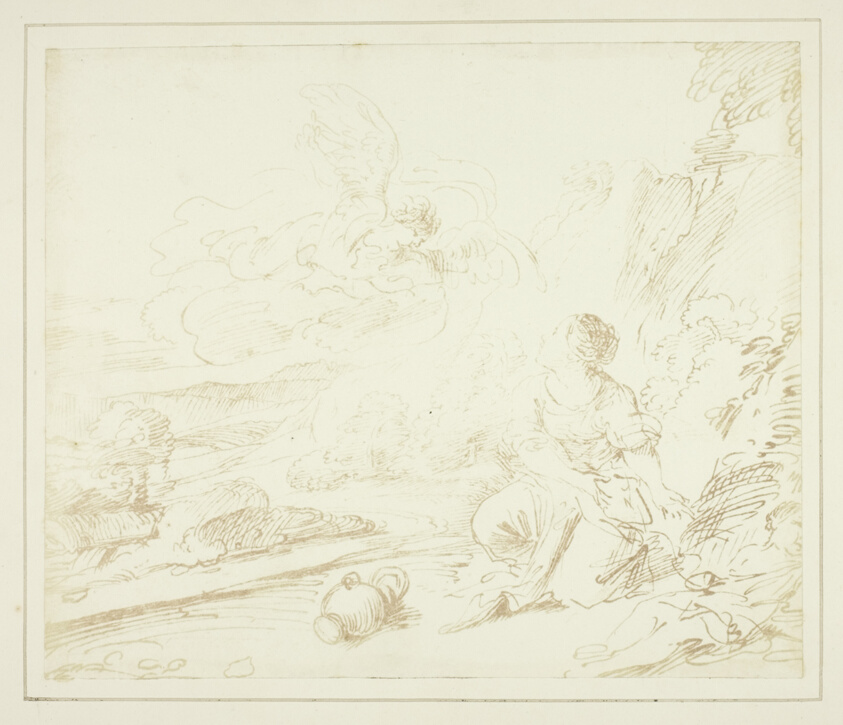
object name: Photograph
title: Hagar in the Desert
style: 19th century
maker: William Henry Fox Talbot (English, 1800–1877)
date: c. 1840/44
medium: Salted paper print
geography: England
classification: salted paper print; photographic process; photography; photograph